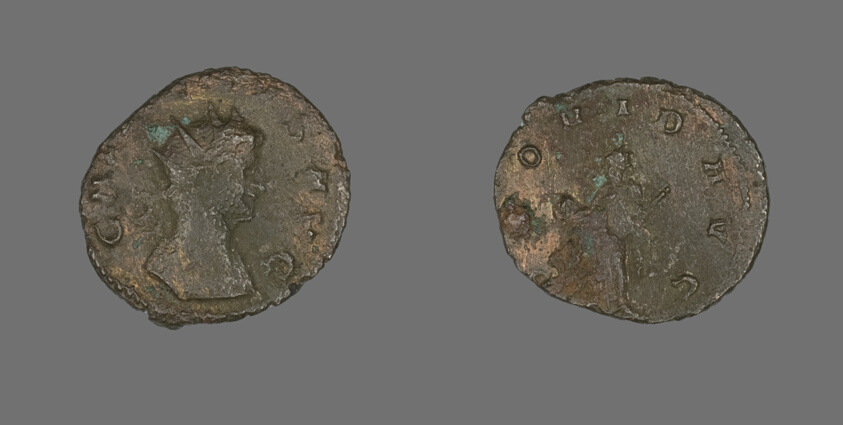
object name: Coin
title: Antoninianus (Coin) Portraying Emperor Gallienus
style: roman (ancient, style or period)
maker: Roman, minted in Rome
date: 260-268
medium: Billon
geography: Roman Empire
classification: coin; ancient art